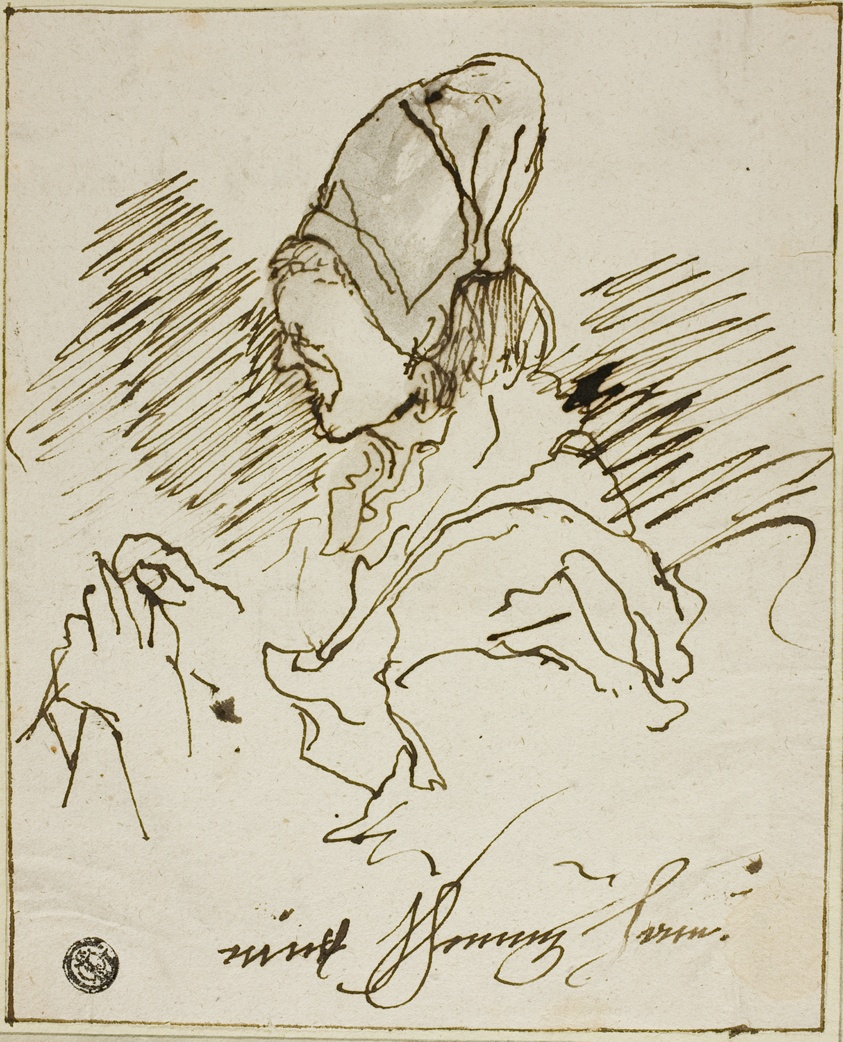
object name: Drawing and Watercolor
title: Seamstress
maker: Attributed to Claude Hoin (French, 1750-1817); or Gian Lorenzo Bernini (Italian, 1598-1680); or an unknown German artist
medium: Pen and brown ink, with brush and gray wash, on ivory laid paper, laid down on ivory laid card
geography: France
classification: pen and ink drawings; drawings (visual works); prints and drawing